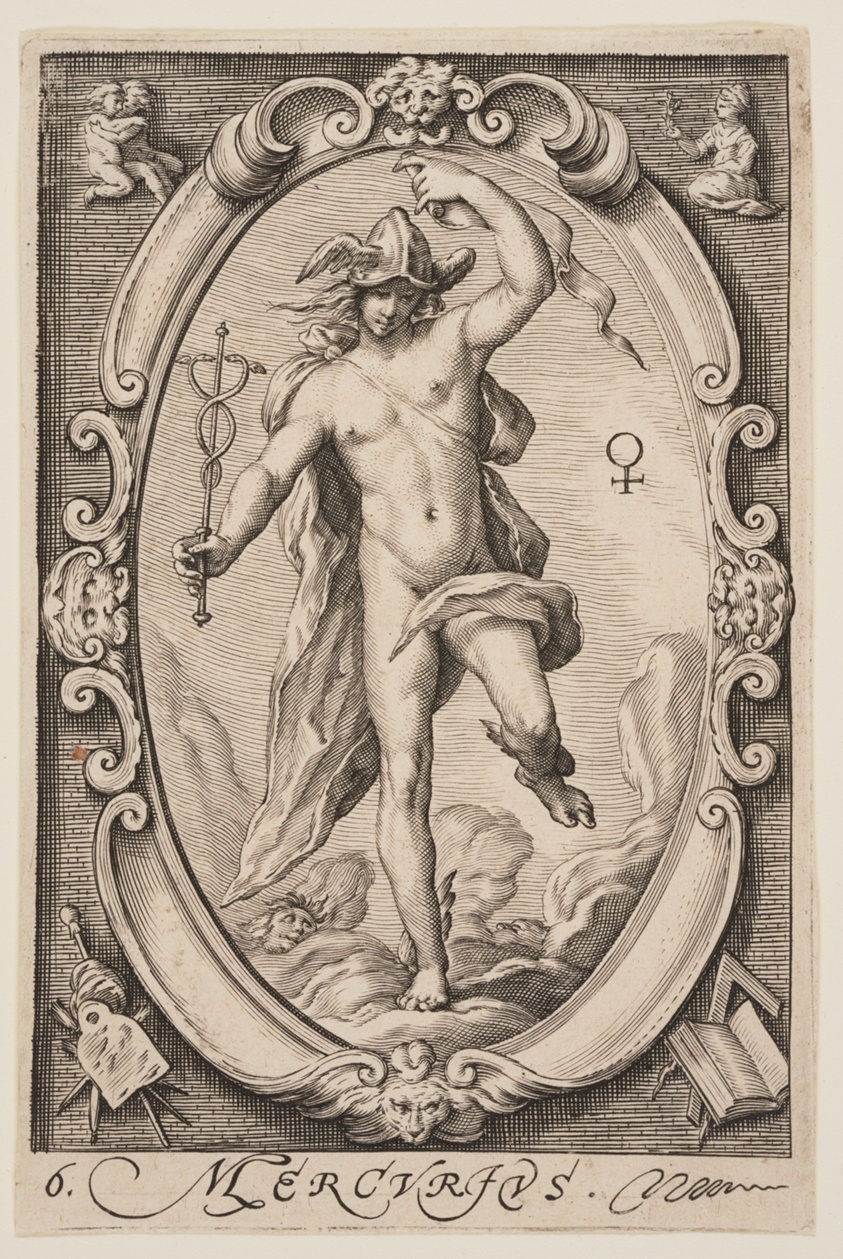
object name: Print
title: Mercury, from The Seven Planets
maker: Jacob Matham (Dutch, 1571–1631); after Hendrick Goltzius (Dutch, 1558–1617)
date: 1597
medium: Engraving on ivory laid paper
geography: Netherlands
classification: engraving; paper; print; prints and drawing